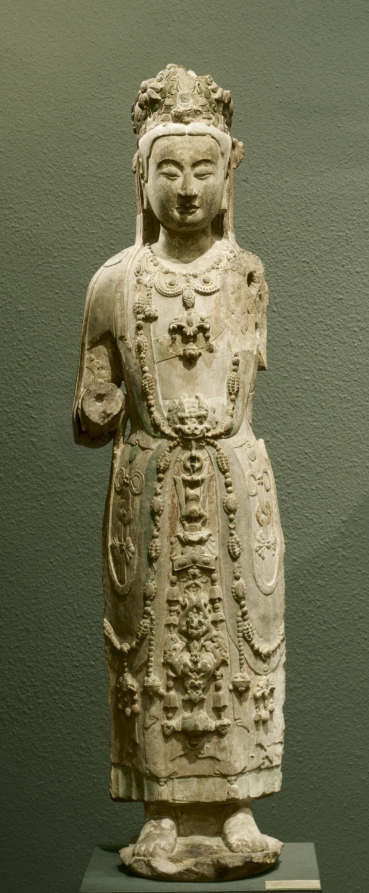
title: Bodhisattva Guanyin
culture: China, late Northern Qi (550–577) or early Sui dynasty (581–618)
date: late 500s–early 600s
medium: sandstone with polychromy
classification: Sculpture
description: The artistic excellence of this bodhisattva is further reinforced by comparable outstanding Chinese Buddhist sculptures excavated at Qingzhou in Shandong Province in 1996—one of the most sensational and significant archaeological finds of the 1900s. Like related types among the Qingzhou finds, this statute has a gently smiling face and meticulous detailing of splendid jewelry. A noticeable difference, however, is the unique yingluo 瓔珞 (mukt hara) worn by the bodhisattva for personal adornment. The somewhat bizarre but imaginative combination of a string of jewels with grotesque animal masks, flying apsara, jade pendants, dragons, and metal ornaments was probably a regional decorative style of Shanxi Province.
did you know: The carved and painted back suggest that the bodhisattva was originally displayed where it could be viewed in the round.